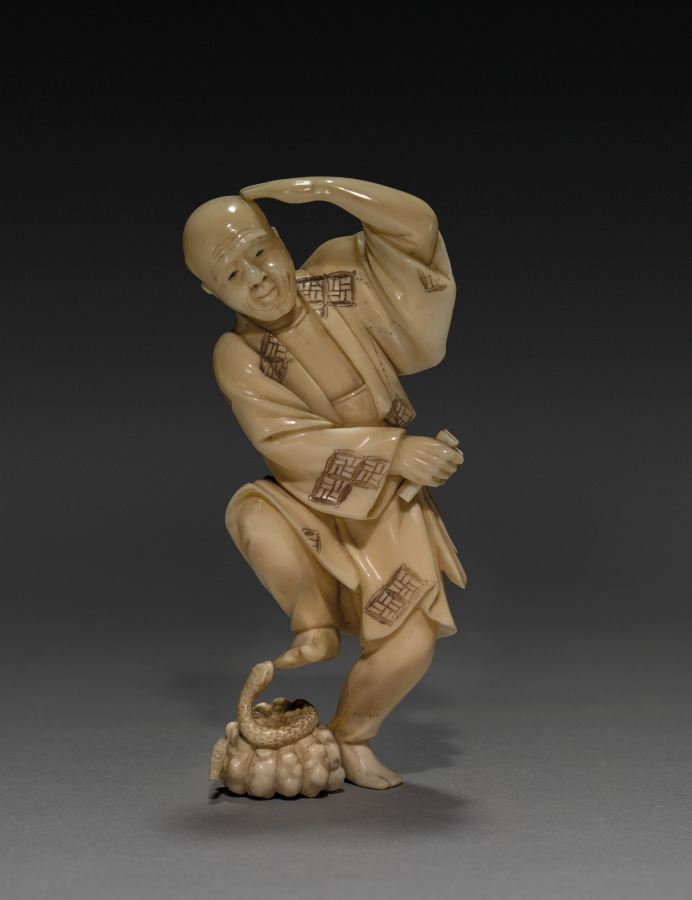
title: Man and Serpent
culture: Japan, Meiji period (1868–1912)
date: early 1900s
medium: ivory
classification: Ivory